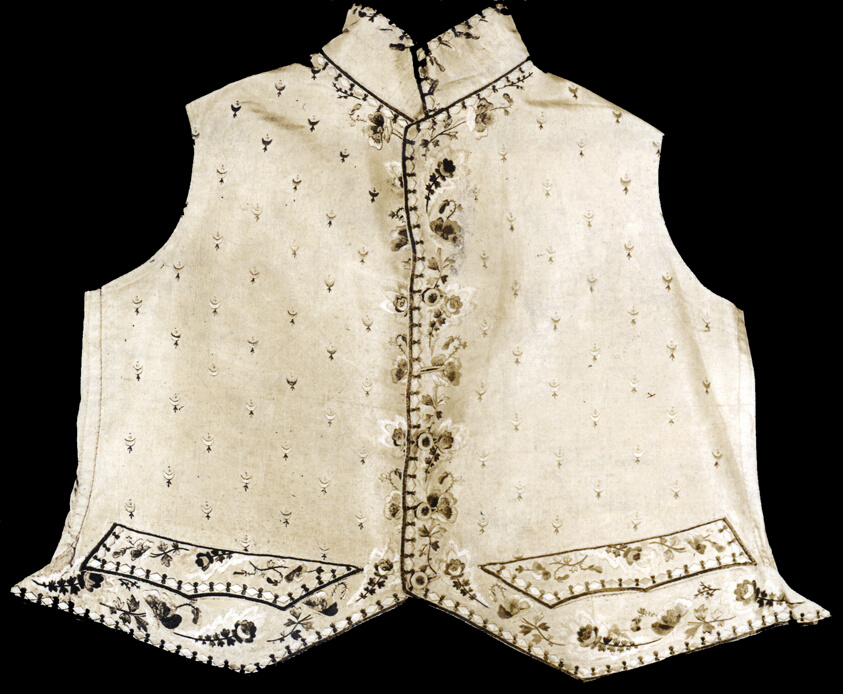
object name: Costume and Accessories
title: Waistcoat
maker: France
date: 18th century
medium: Silk, warp-faced plain weave; embroidered with silk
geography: France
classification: textile; needlework (visual works); costume; dress (garment); clothing